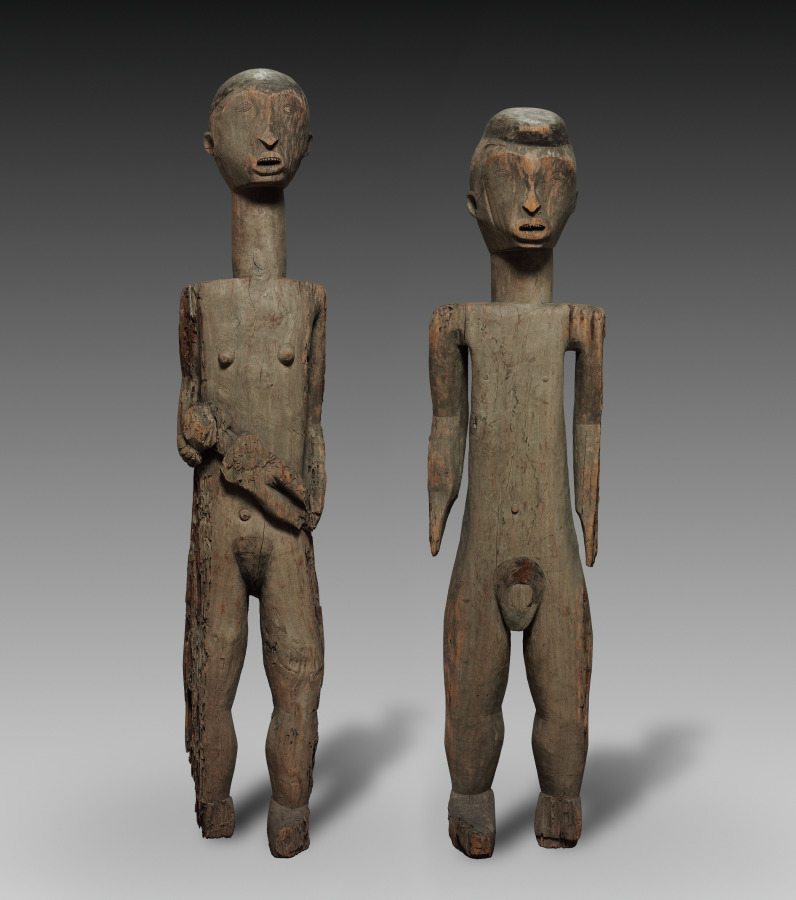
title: Pair of Figures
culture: Africa, Central Africa, Democratic Republic of the Congo or Central African Republic (most likely), possibly Monzombo-style maker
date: late 1800s–early 1900s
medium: Wood and iron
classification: Sculpture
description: The Ubangi region's history of successive migrations and assimilations has resulted in numerous exchanges of religious beliefs and ritual practices. Despite some stylistic traits, including the heart-shaped faces and the male's crested coiffure, this figure with its female pair is unlike any other in the Ubangian corpus. Based on indirect evidence, the pair is said to represent the culture's primordial couple.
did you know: This male and female pair is said to represent the culture's primordial couple.